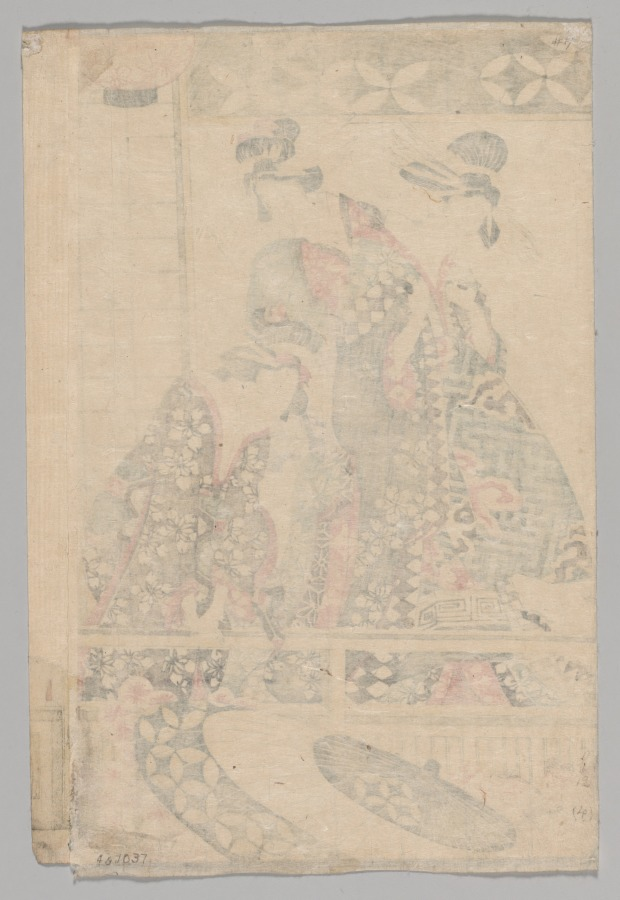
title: Yoshiwara Women Looking into the Street at Springtime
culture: Japan, Edo period (1615–1868)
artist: after Kitagawa Utamaro (Japanese, c. 1754–1806)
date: 1753–1806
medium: color woodblock print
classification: Print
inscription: Signature: Utamaro fude